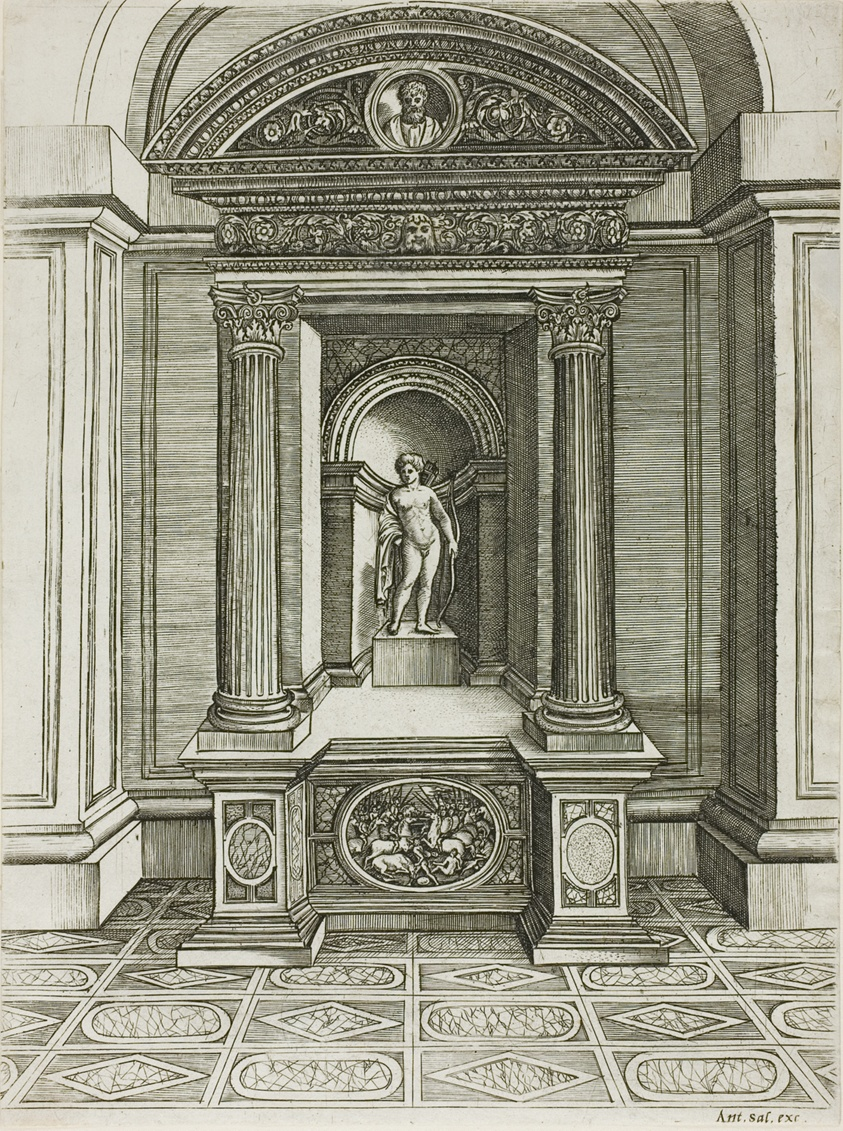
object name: Print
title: The Altar of Love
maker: Agostino dei Musi (Italian, c. 1490-after 1536); printed by Antonio Salamanca (Italian, 1478-1562)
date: 1510/36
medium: Engraving in black on ivory laid paper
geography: Italy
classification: engraving; print; prints and drawing